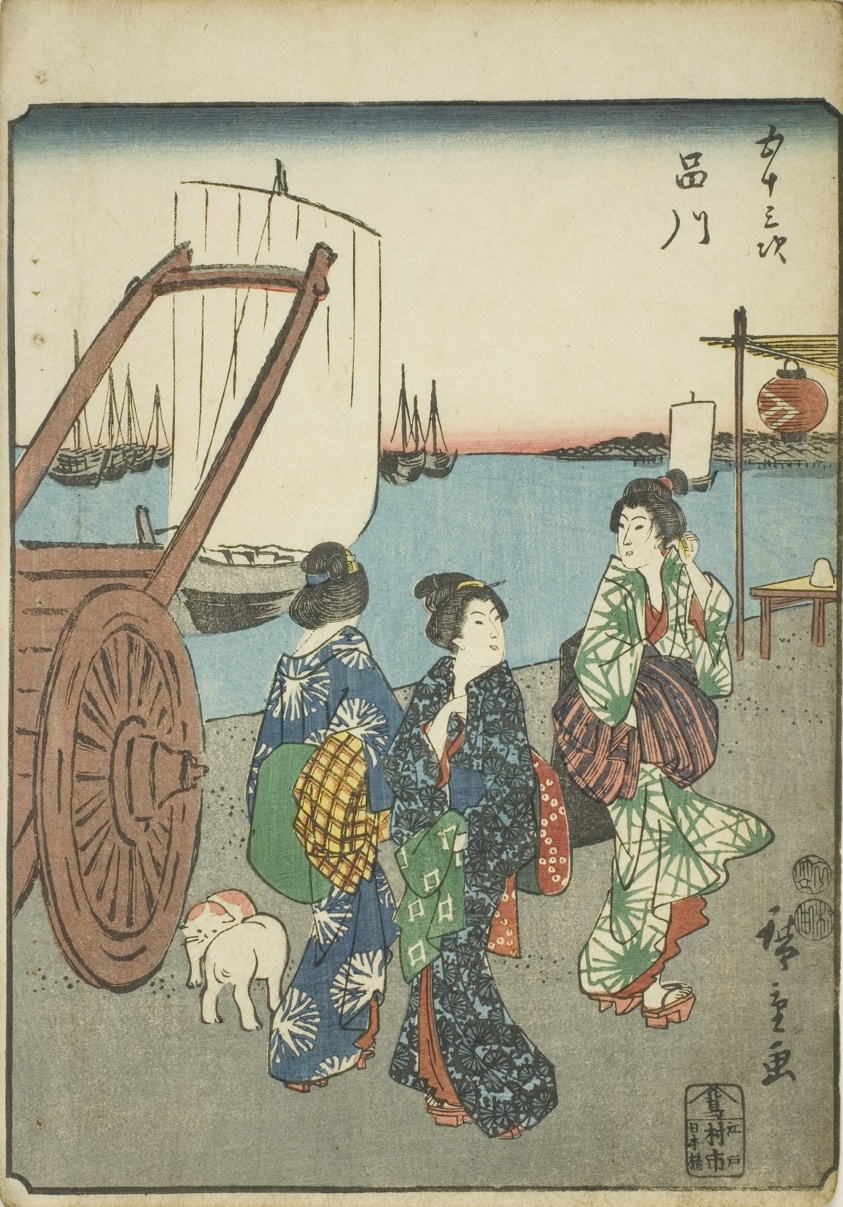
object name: Print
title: Shinagawa, from the series "Fifty-three Stations [of the Tokaido] (Gojusan tsugi)," also known as the Figure Tokaido (Jinbutsu Tokaido)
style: Japanese (culture or style)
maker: Utagawa Hiroshige 歌川 広重; Japanese, 1797-1858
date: 1852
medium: Color woodblock print; chuban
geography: Japan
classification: woodblock print; print